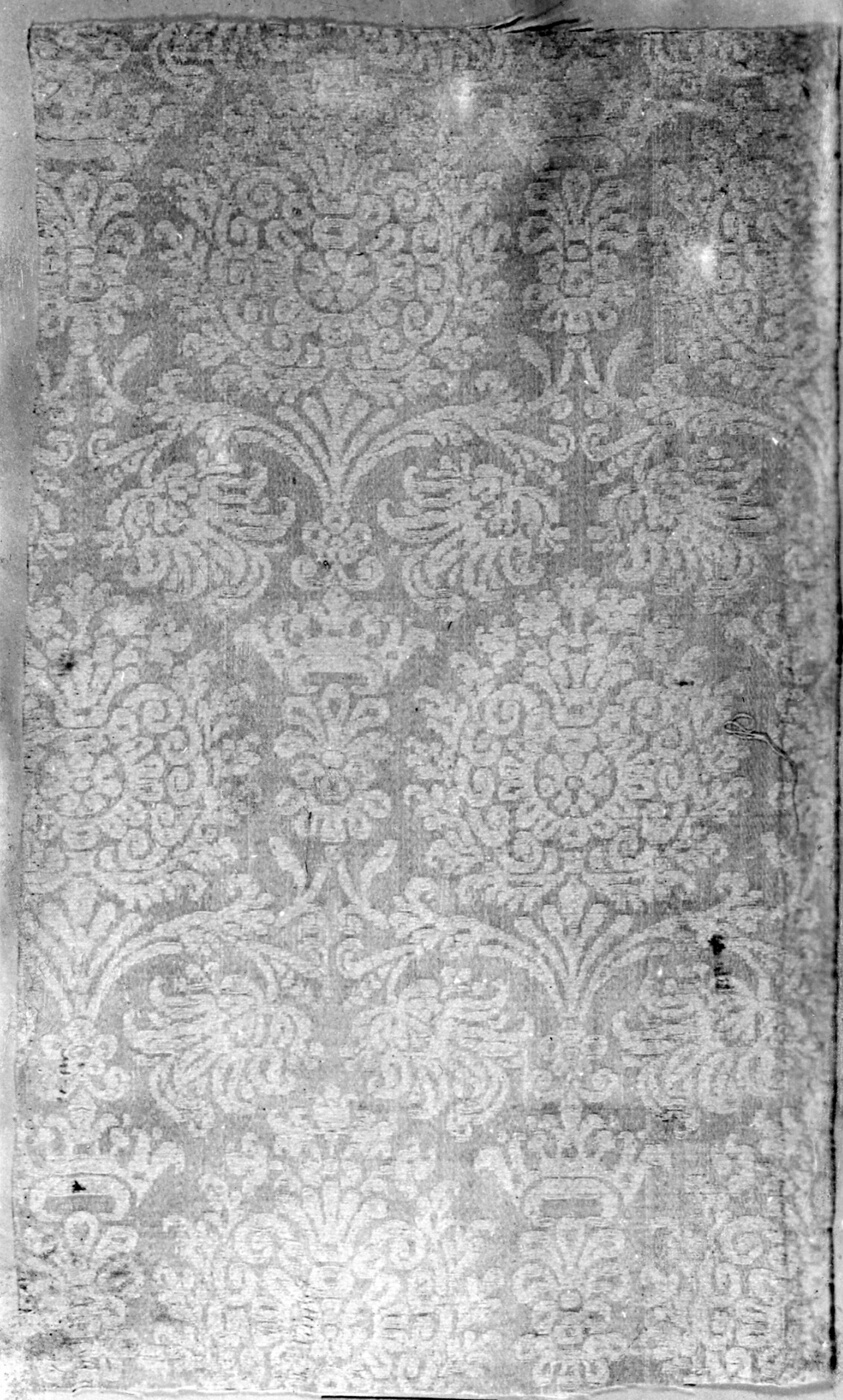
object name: Textile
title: Panel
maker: Netherlands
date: 17th century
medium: linen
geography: Netherlands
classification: textile; weaving